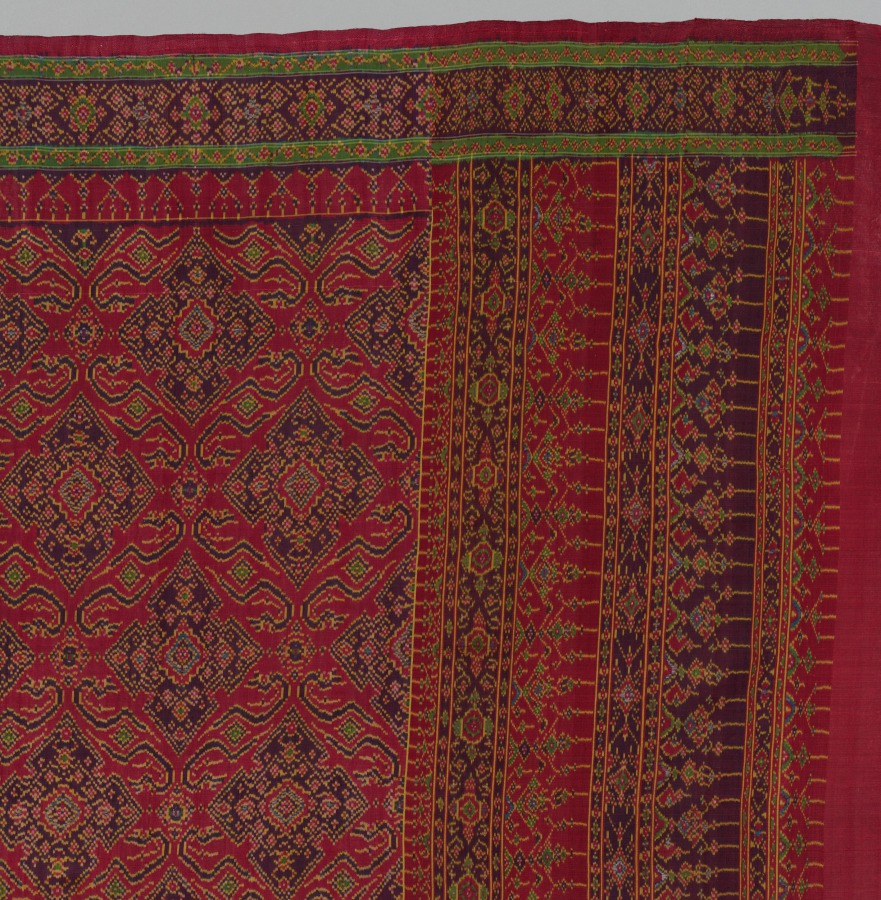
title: Half of a "Sampot" (Skirt Cloth)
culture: Cambodia, 19th - early 20th century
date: 1800s–early 1900s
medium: tabby weave, weft ikat; silk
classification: Textile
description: Ikat-dyed silks from Southeast Asia are weft ikats. Both the technique and the use of silk originated in India and spread to those parts of Southeast Asia that were accessible to international trade. There, it gradually replaced the earlier technique of warp ikat using cotton. The antiquity of this technique in Cambodia is indicated by weft-ikat designs that are preserved on sculptures of the Ankor period (9th-13th centuries). The diagonal lattice pattern in the central field of this textile was common throughout Southeast Asia. Because the textile was inteded to be a skirt cloth, there is little figural representation in its design.